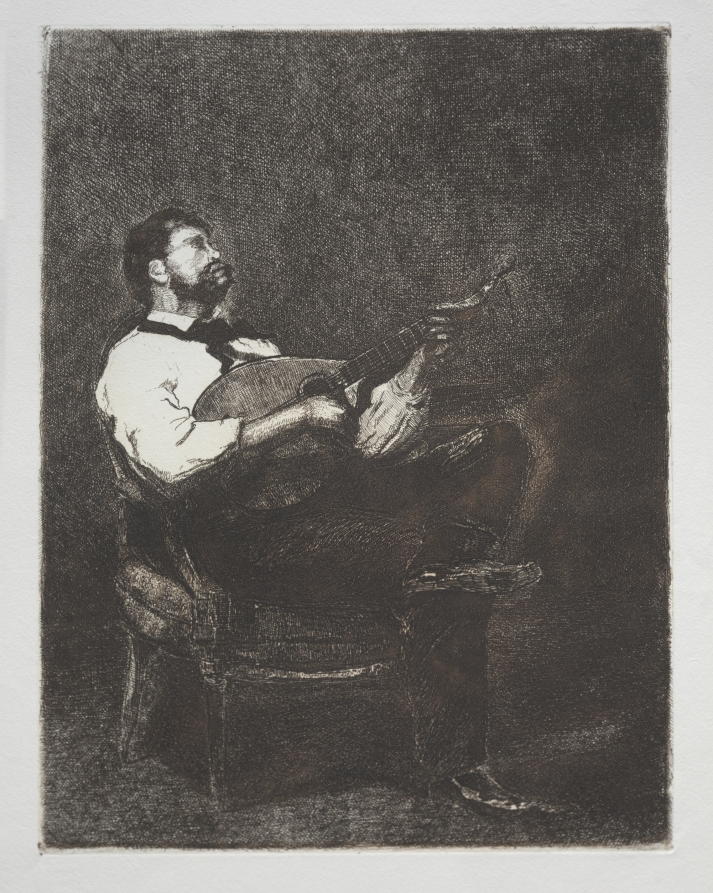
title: Guitar Player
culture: France, 19th century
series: Première suite de dix eaux-fortes par François Bonvin, peintre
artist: François Bonvin (French, 1817–1887)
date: 1861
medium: etching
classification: Print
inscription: in graphite, on verso: "Bonvin le Guitarist II"